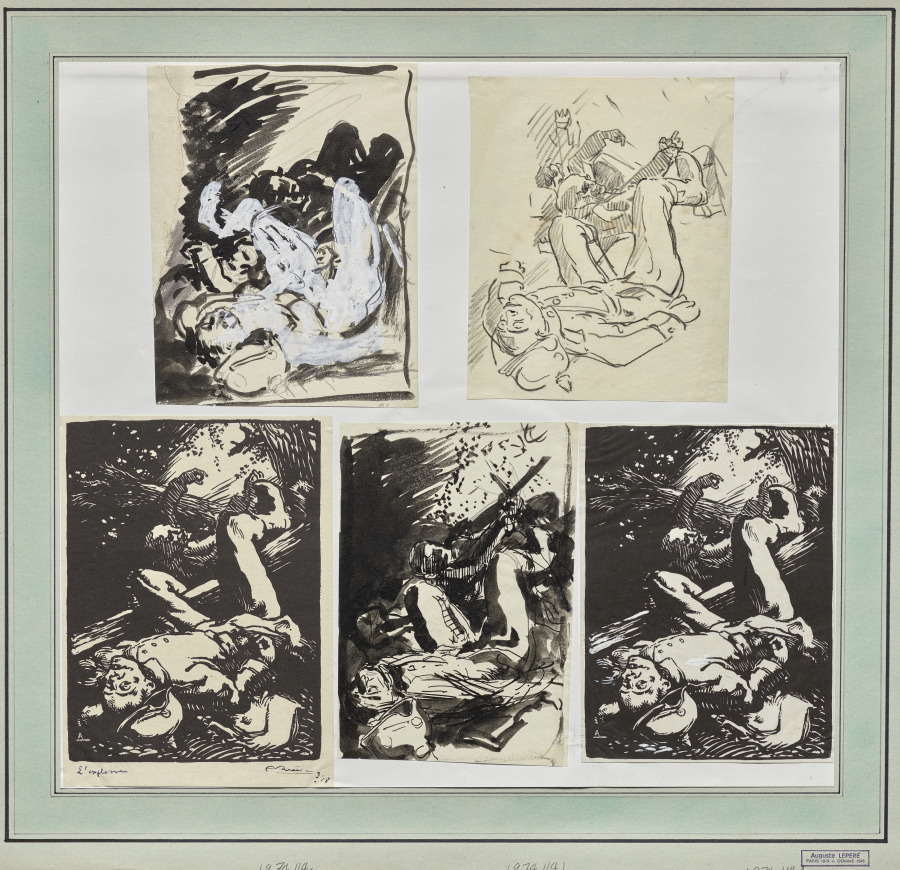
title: L'Explosion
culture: France, 20th century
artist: Auguste Louis Lepère (French, 1849–1918)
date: 1914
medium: black crayon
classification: Drawing